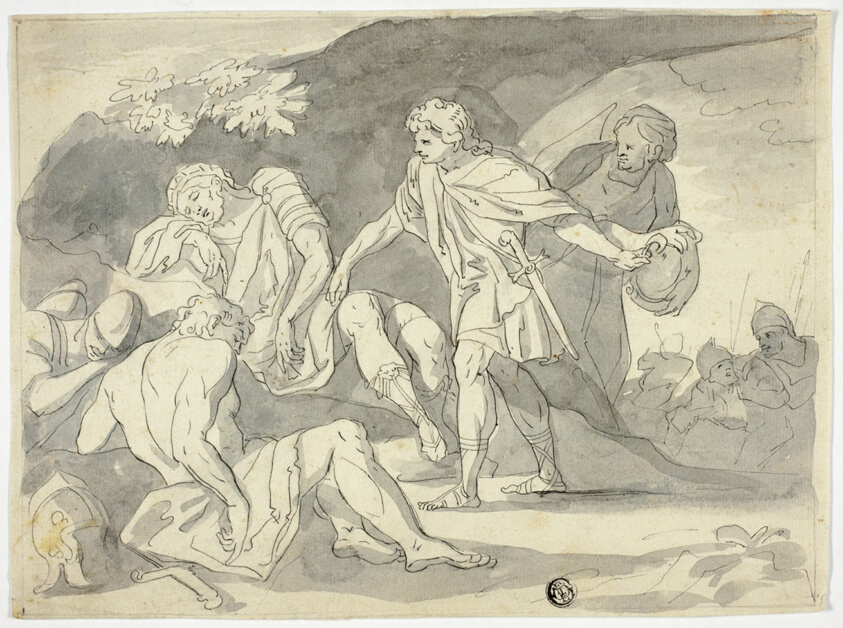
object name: Drawing and Watercolor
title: David Cutting Off Skirt of Saul's Robe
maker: Unknown Artist; French, 18th century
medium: Pen and black ink, with brush and gray wash, on ivory laid paper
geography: France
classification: pen and ink drawings; drawings (visual works); prints and drawing